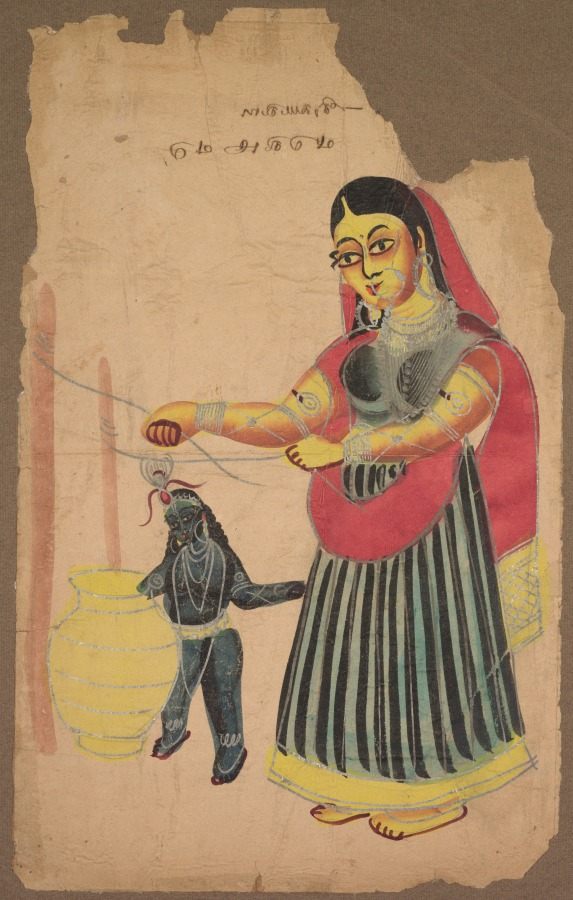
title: Yasoda with Krishna Churning Butter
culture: Eastern India, Kolkata, Kalighat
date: c. 1890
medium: Gum tempera, ink, graphite, and tin on paper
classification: Painting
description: Yashoda, wife of the head of the cowherd village, raised Krishna from infancy. She is shown here churning milk into butter, while the mischievous toddler Krishna tips his hand in the pot to steal the rich cream. Kalighat paintings were made for pilgrims to take home and keep on domestic shrines. Made swiftly on inexpensive paper, they are a genre of art available to a wide swath of people.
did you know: The Hindu god Krishna eats butter, like the sacrificial fire into which Brahman priests pour ghee.